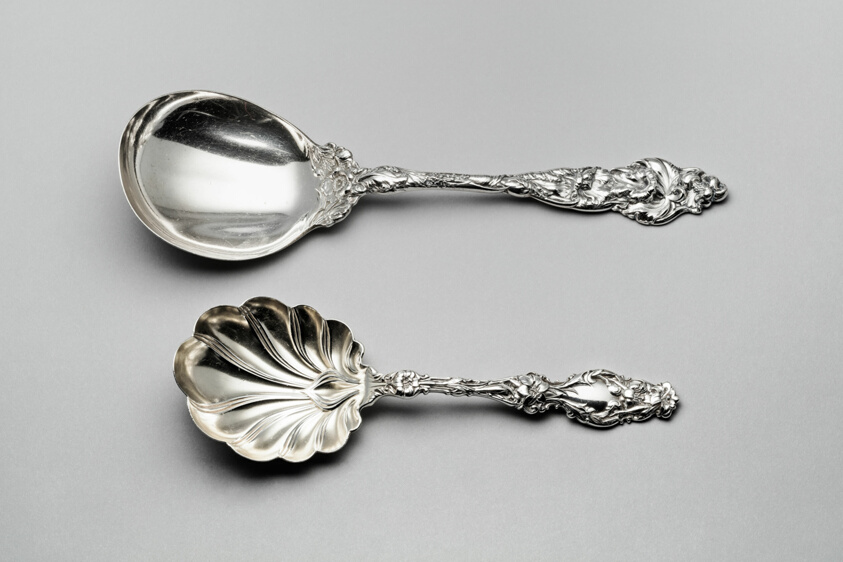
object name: Metalwork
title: Berry Spoon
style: 20th Century, Arts and Crafts Movement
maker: Whiting Manufacturing Co. (American, 1866–1926); New York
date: 1902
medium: Silver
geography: New York City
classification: utensil for serving food; silver; utensil; spoon; american decorative arts; american arts; decorative arts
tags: spoon, shells, flowers, dining, eating